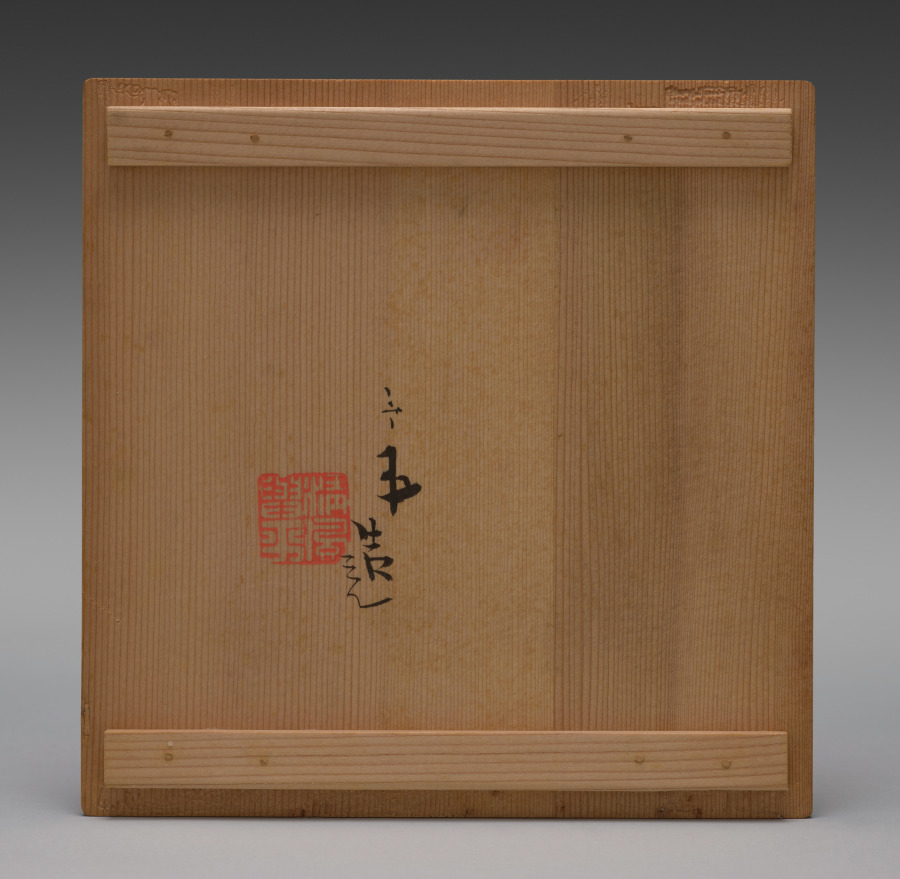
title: Bowl with Dragons Chasing Flaming Jewels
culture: Japan, Meiji period (1868–1912) to Taishō period (1912–26)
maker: Seifū Yohei III (Japanese, 1851–1914)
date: 1893–97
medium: Porcelain with molded and carved design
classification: Ceramic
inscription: 大日本清風造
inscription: 清風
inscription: 清風與平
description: The decoration of this large bowl, described as a donburi on one side of its box, is executed entirely in molded and carved relief under a creamy, pink-tinged translucent glaze. The main motif is a pair of four-clawed dragons pursuing flaming jewels. As is standard for this design, the beasts are surrounded by wisps of cloud, and a foliate pattern runs around the bottom of the basin. A geometric pattern circles the exterior of the footring. The white-on-white design makes the bowl subtle and elegant.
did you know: Kyoto-based Japanese ceramist Seifū Yohei III (1851–1914) admired the glaze colors found on Chinese porcelain and tried to replicate them through intensive experimentation.